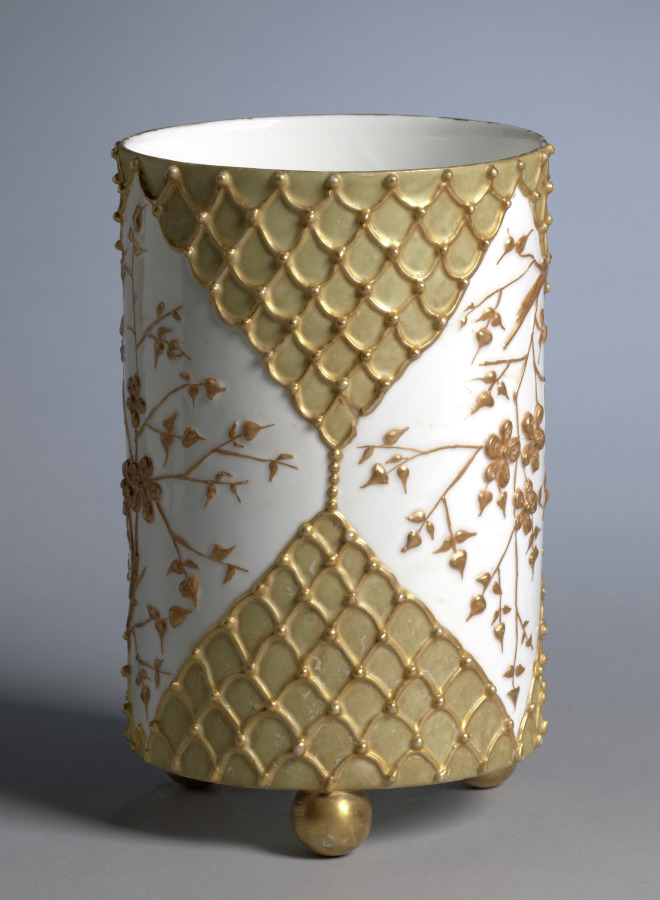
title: Vase (Lotus Ware)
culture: America, Ohio, East Liverpool, 19th century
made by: Knowles, Taylor and Knowles Company (American)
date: c. 1895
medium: porcelain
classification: Ceramic